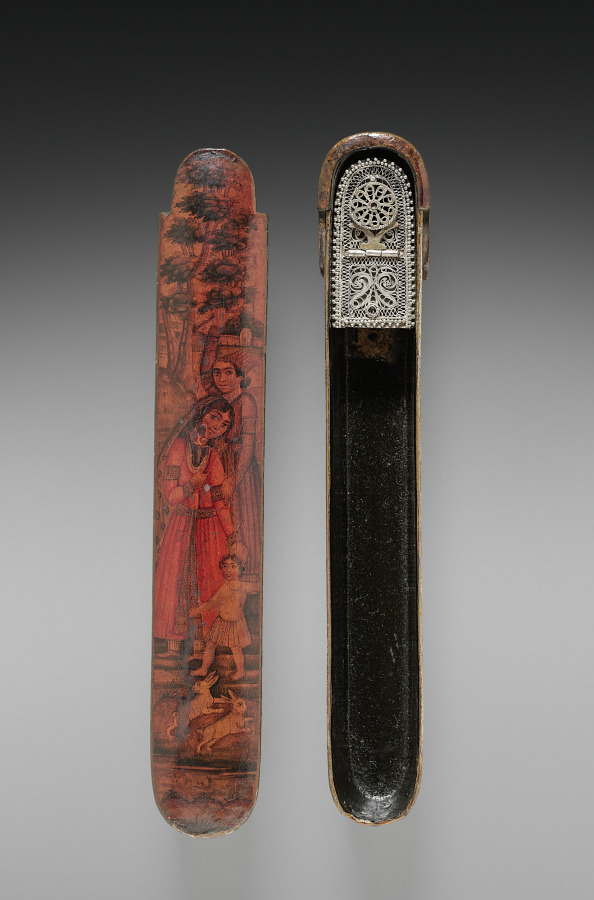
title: Pen and Ink Box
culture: Iran, Qajar period (1779-1925)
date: 1800s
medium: lacquer over papier maché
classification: Lacquer